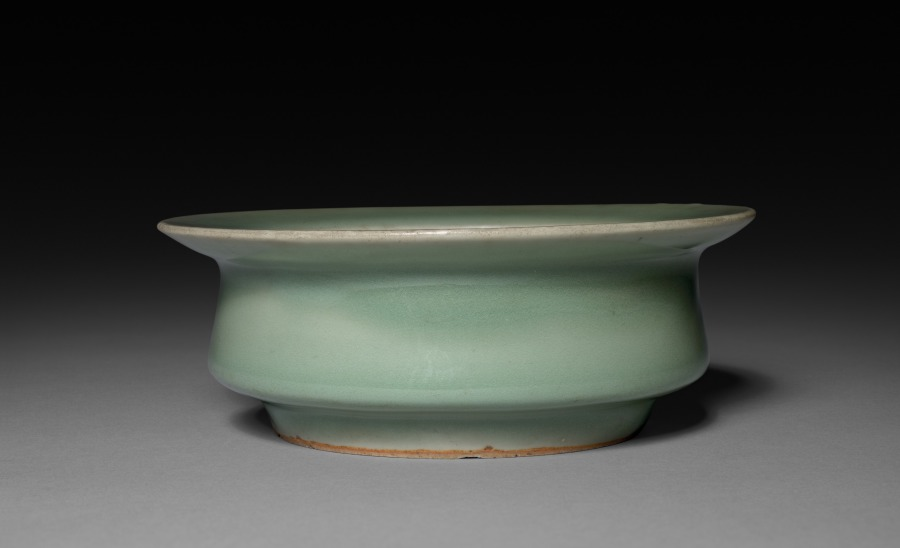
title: Brush Washer: Longquan Ware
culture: China, Southern Song dynasty (1127-1279)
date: 13th Century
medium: glazed porcelain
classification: Ceramic